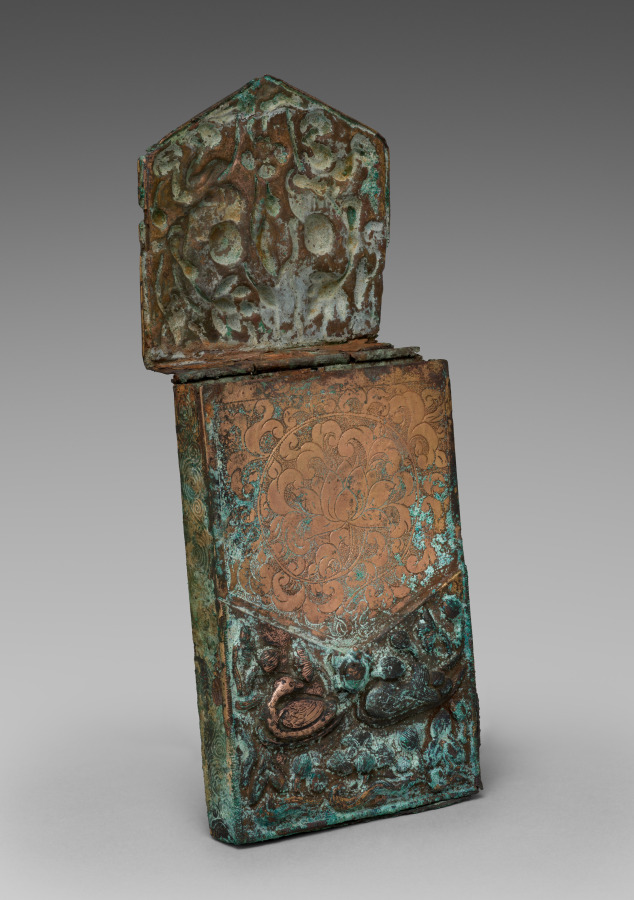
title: Sutra Container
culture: Korea, Goryeo dynasty (918–1392)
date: 1100s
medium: gilt bronze with incised and high relief decoration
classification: Metalwork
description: This is a portable container once used to preserve a miniature Buddhist sacred text. Created by hammering the reverse, high-relief designs on both the front and back of the case depict a peaceful pond where young boys are holding giant lotus flowers in their hands, and a pair of mandarin ducks are swimming. Probably the playful boys represent newly reborn souls in the Pure Land.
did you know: This is a portable container once used to preserve a miniature Buddhist sacred text, particularly useful for traveling Buddhist pilgrims.